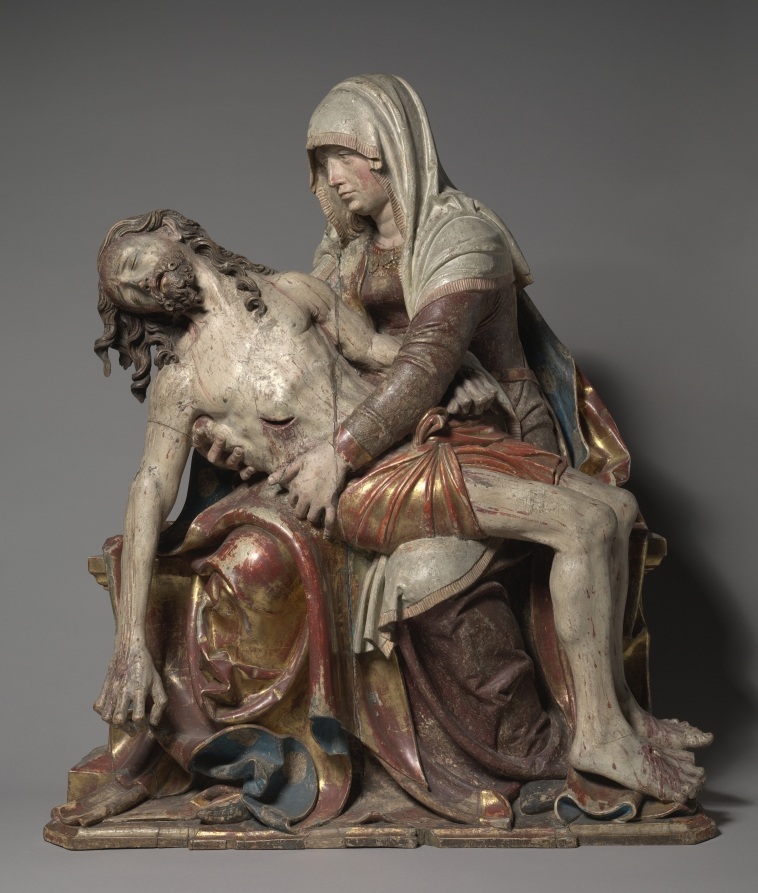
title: Vesperbild (Pietà)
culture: Germany, Upper Bavaria, 16th century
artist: Master of Rabenden (German)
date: c. 1515–20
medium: lindenwood, polychromed and gilded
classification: Sculpture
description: Depicting the Virgin cradling Christ’s dead body, works like this one were known in German as vesperbilds, owing to their incorporation into the liturgy of the evening prayer (vespers) on Good Friday. The word pietà—from the Latin pietas, meaning "piety" or "compassion"—was also used to describe such works. Like other devotional image types that emerged in southern Germany in the later medieval period, vesperbilds encouraged viewers to contemplate Christ’s suffering and empathize with the Virgin’s sorrows more directly and emotively than ever before. This anonymous German artist is named after one of his most important works, the high altar of the church of Rabenden in the Chiemgau, the foothills of the Alps. The sculpture was likely placed in a secondary chapel in a Bavarian church.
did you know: This sculpture sensitively depicts the Virgin cradling the body of Christ. This devotional image was likely placed near the altar in a German chapel. Imagine standing in a small, quiet chapel looking up at these lifelike figures with flickering candles casting dappled light onto their surface.